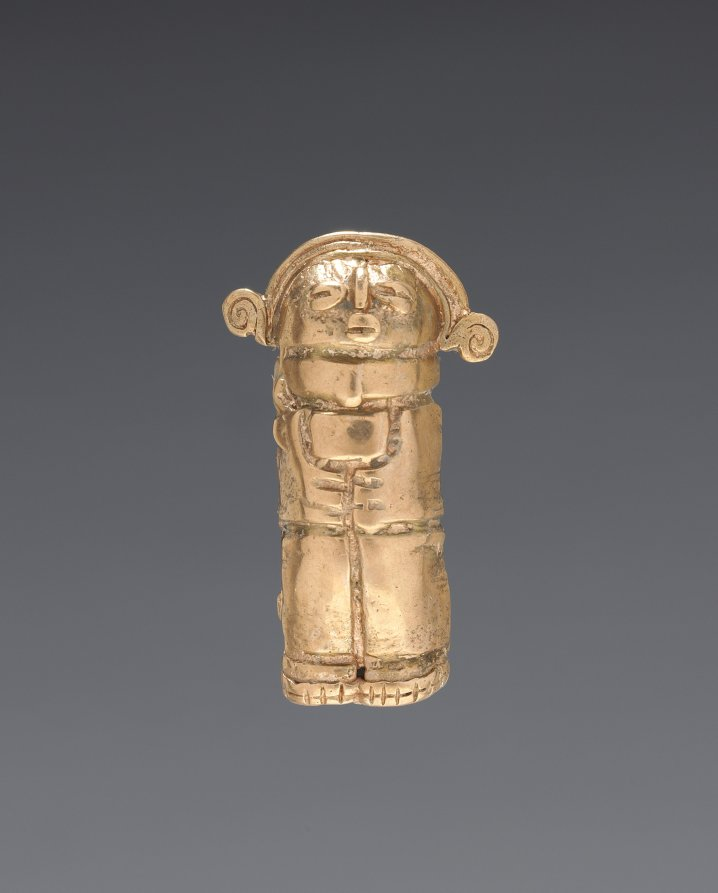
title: Necklace Figurine Bead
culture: Colombia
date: 1–700 CE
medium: cast gold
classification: Jewelry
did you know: Working with gold dates back to at least 500 BC in Ecuador and Colombia.